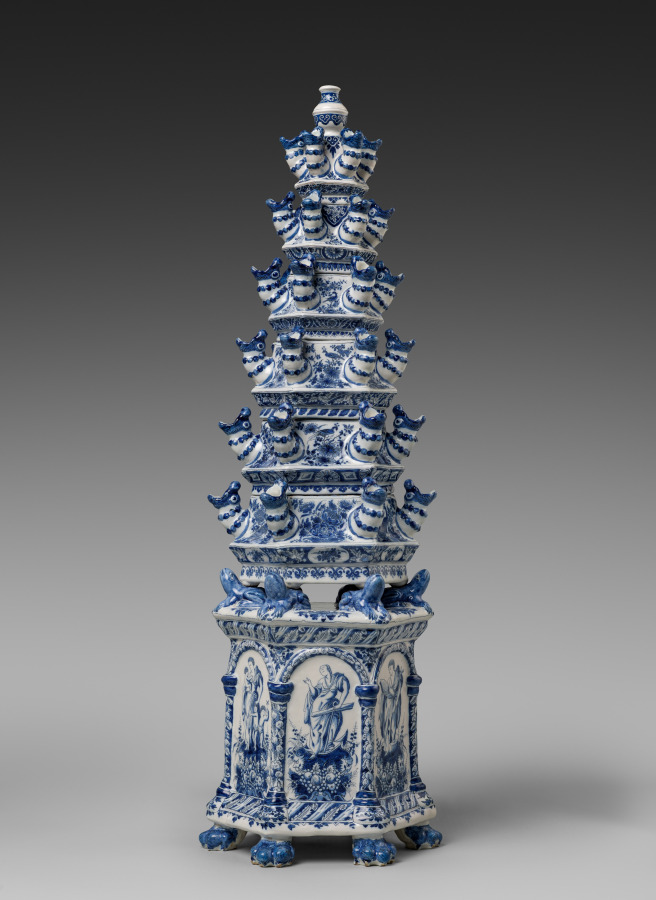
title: Flower Pyramid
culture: Netherlands, Holland, Delft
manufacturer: Adrianus Kocx (Dutch, active 1686–1701)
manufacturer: De Grieksche A (The Greek A) Factory (Netherlands, 1658–1811)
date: c. 1690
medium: Tin-glazed earthenware, painted in blue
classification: Ceramic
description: Allegorical figures representing Faith, Hope, and Love decorate the base of this pyramid, on which rest six tiers with spouts where flowers can be placed. Flower pyramids are among the most complex and luxurious types of ceramics produced in Delft in the late 1600s. This example was made in the Greek A Factory, owned by Adrianus Kocx. During his tenure, the factory became the most prestigious of Delft potteries and received commissions from Queen Mary II, who ruled over England, Scotland, and Ireland together with her husband, William III. She contributed to the international spread of the fashion for Delft ceramics.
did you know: The iconic blue-and-white ceramics from Delft originated as an attempt to copy Chinese porcelain.